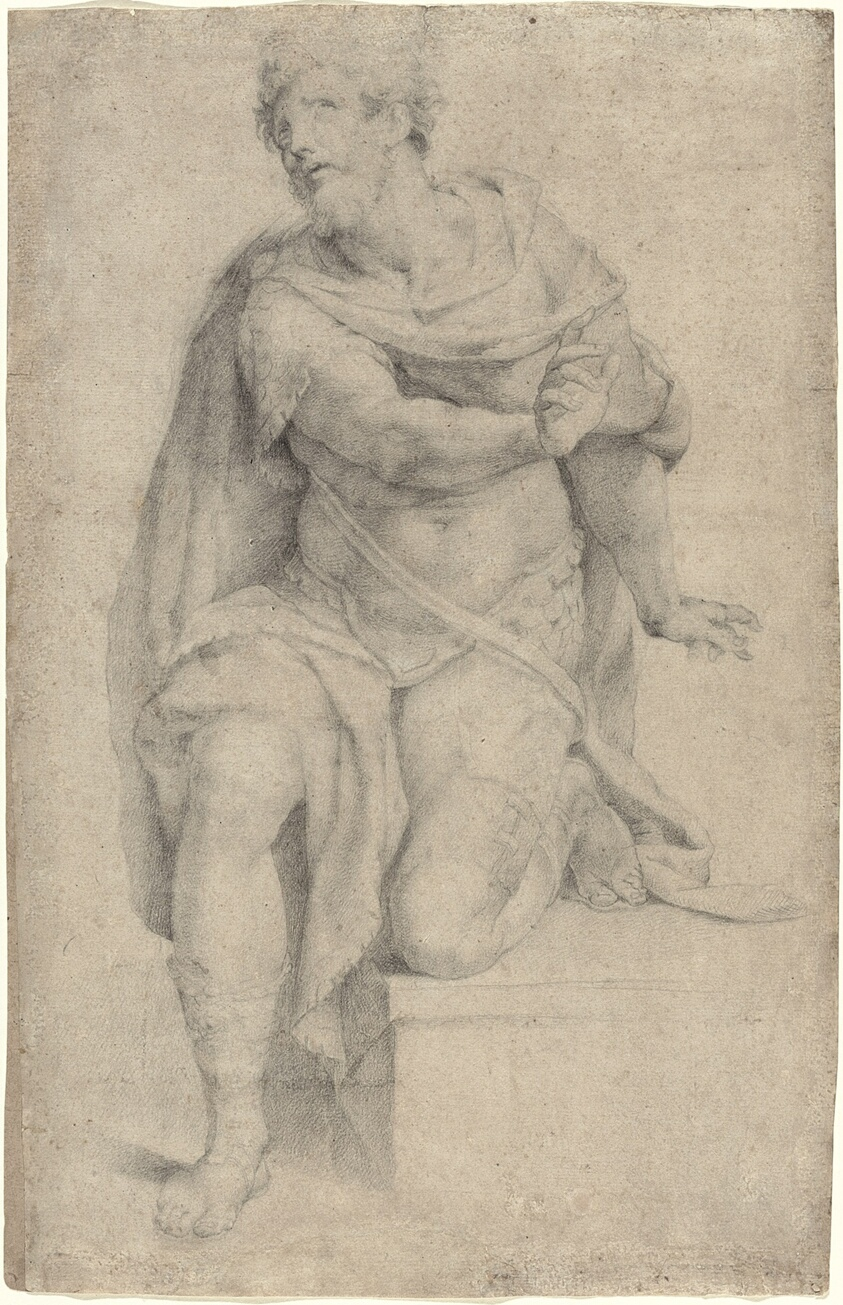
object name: Drawing and Watercolor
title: Study of a Kneeling Saint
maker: Orazio Samacchini (Italian, 1532–1577)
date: 1570/75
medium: Black chalk on cream laid paper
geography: Italy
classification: drawings (visual works); chalk; paper; prints and drawing